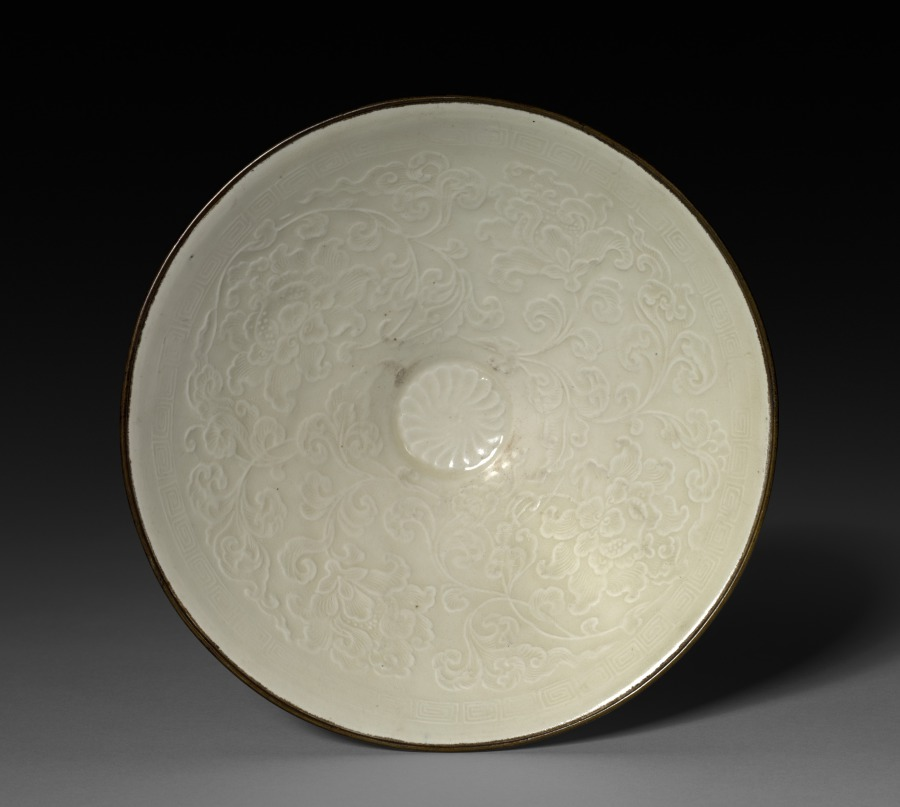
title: Bowl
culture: China, Hebei province, Chuyang District, Jin dynasty (1115-1234)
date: 12th Century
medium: White porcelain, Ding ware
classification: Ceramic